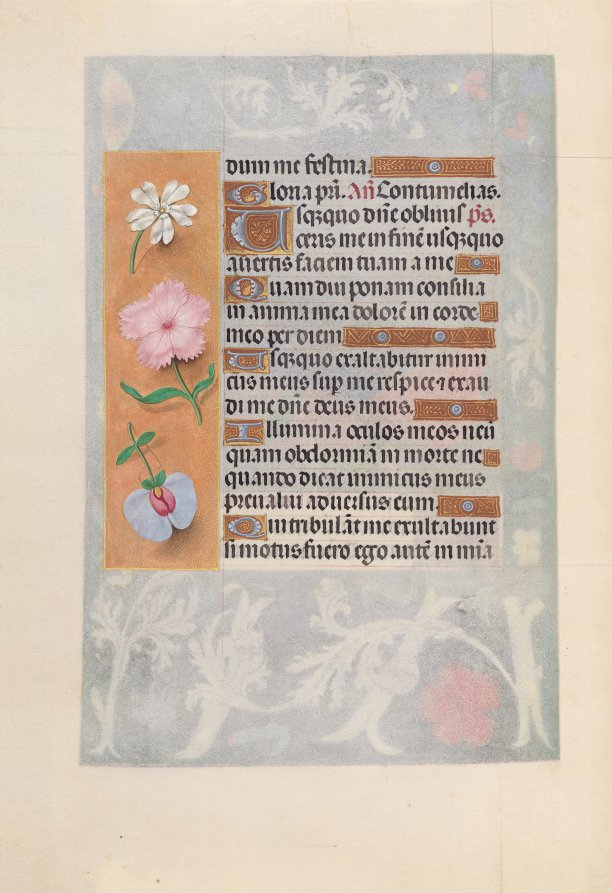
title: Hours of Queen Isabella the Catholic, Queen of Spain: Fol. 57v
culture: Flanders, Ghent and Bruges, late 15th century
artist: Master of the First Prayerbook of Maximillian (Flemish, c. 1444–1519)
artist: and Associates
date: c. 1500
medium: ink, tempera, and gold on vellum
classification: Bound Volume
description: This manuscript was illuminated by a circle of at least five highly organized manuscript painters active in the Flemish cities of Ghent and Bruges. The principal illuminator was Alexander Bening, who painted the majority of the book's miniatures. Manuscripts produced by this circle of artists are renowned for the decoration of their borders, which typically feature a rich variety of realistically-painted flowers, birds, and butterflies. This prayer book, called a book of hours, was intended not for a cleric, but for the private devotions of a lay person-in this case, Isabella the Catholic, Queen of Spain (1451-1504). Isabella's coat of arms embellishes the book's frontispiece. It is unlikely that the book was commissioned by the Queen herself; rather, she probably received it as a diplomatic gift from someone courting her patronage, perhaps Cardinal Francisco Jimenez de Cisneros. A Franciscan friar, Jimenez was dependent upon Isabella for his advancement, first to the post of Queen's confessor in 1492, and then to Archbishop of Toledo in 1495.